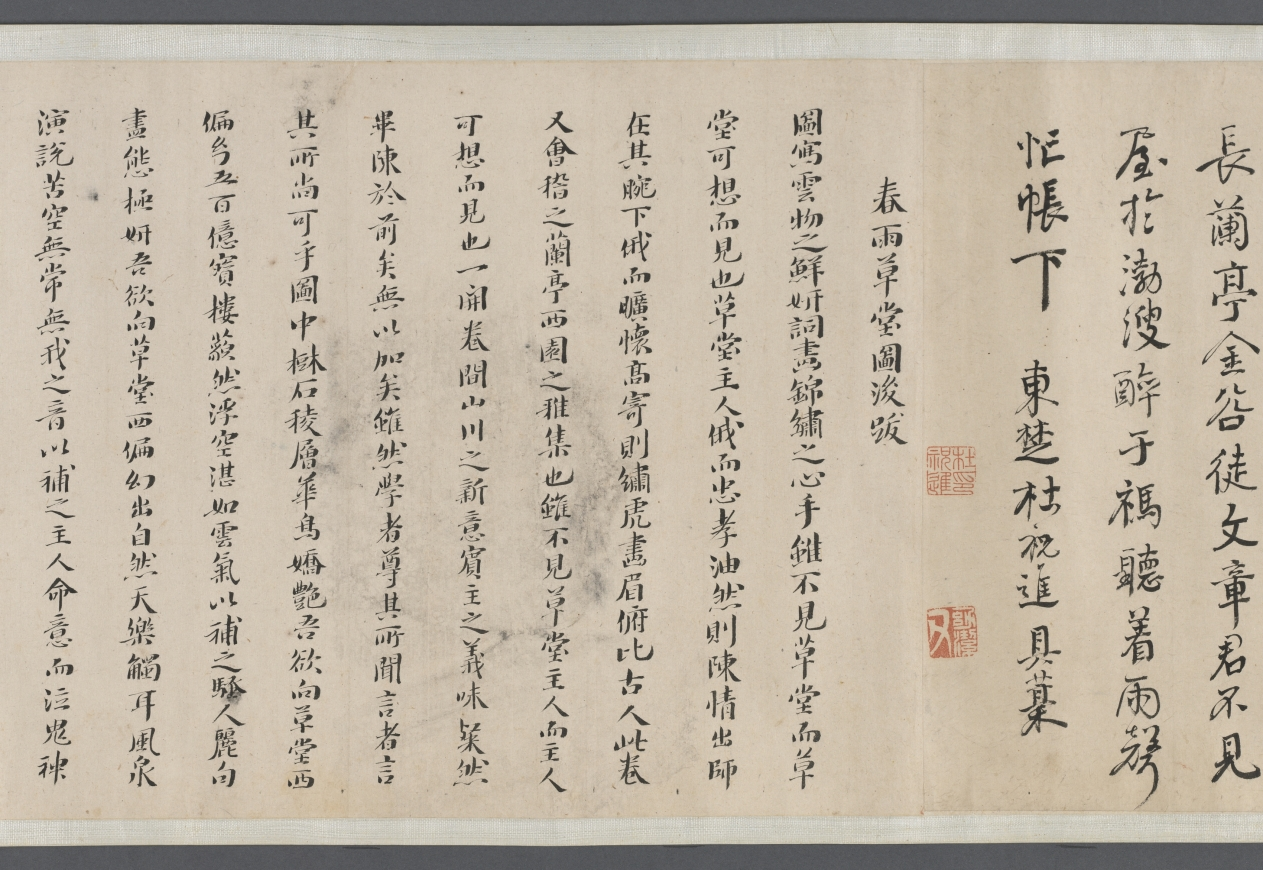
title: Spring Rain Thatched Hut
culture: China, Qing dynasty (1644-1911)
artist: Wang Jianzhang (Chinese, active 1621–1662)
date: 1650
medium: handscroll, ink on paper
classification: Drawing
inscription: Title by Wu Zhiying 吳芝瑛 (1868–1933), dated 1910.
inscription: 春雨草堂圖。庚寅仲春，為紫玄社兄畫於若耶溪上。 仲初王建章。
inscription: 12 colophons by Gong Weiliu’s 宮偉鏐 (1611–1680) contemporaries: Fang Gongqian 方拱乾 (1596–1667, jinshi of 1628); Jiang Cai 姜埰 (1607–1673); Liang Yizhang 梁以樟 (1608–1665); Du Shaokai 杜紹凱 (also named Du Jie 杜岕, 1617–after 1689), dated 1648; Zhao Kaixin 趙開心 (d. 1663), dated 1647; Zhao Erbian 趙而忭 (d. 1658); Yu Yaoguang 余耀光, dated 1649; Yao Quan 姚佺, dated 1648; Chen Taisun 陳台孫 (b. 1611, jinshi of 1640); (Monk) Shao 韶; Du Zhujin 杜祝進; and Tang Shi 唐時.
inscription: 此研田莊居士王建章為先太史紫元公所作春雨草堂圖也。居士字仲初，明崇禎間人，與先太史及惲香山相友善。喜畫佛像，自謂不讓李公麟。山水祖述董源，筆力雄健，有不可羈勒之概。香山稱其墨有五采，非世人所知。然性廉重，非同志不輕落筆，人得其寸圖尺縑，必相與忻賞，如獲蜼彝兕敦，非人世間物也！見先太史筆記，此圖寫雨景，而氣韻生動，勃勃於不能止。每一展覽，覺滿紙雲烟，墨瀋猶濕，如寫吾先人胸中未盡之邱壑也。圖後題詠，多一時名手，想見文采風流之盛。迄今二百餘年，舊德先疇，遺風未沫。吾子孫其永寶之，如與吾先人接謦咳於一堂，為感思之助，其敢作圖畫觀乎！同時香山亦有圖佚去己久，不知異日能為延津之合否。壬申長夏本昂重裝敬識。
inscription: Collectors' seals including: Gong Ben'ang 宮本昂 (1821–1874); Lian Qian 廉泉 (1868–1932); Wu Zhiying 吳芝瑛 (1868–1933)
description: With its striking simplicity, this painting captures the pure serenity of a private garden in the moist atmosphere of a spring morning on a small river. Painted in the style of Ni Zan, Wang Jianzhang dedicated this work to his patron-friend Gong Weiliu (1611-1680). Gong retired from government service after the fall of the Ming dynasty and constructed a garden-retreat at his native home in Taizhou, Jiangsu province. He invited scholars and poets from his literary society to contribute writings of his estate, which are here mounted together with the painting in this scroll.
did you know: Gong Weiliu, the owner of the estate portrayed here, had received his prestigious jinshi degree in 1643, but his official career was thwarted by the collapse of the Ming dynasty the following year.